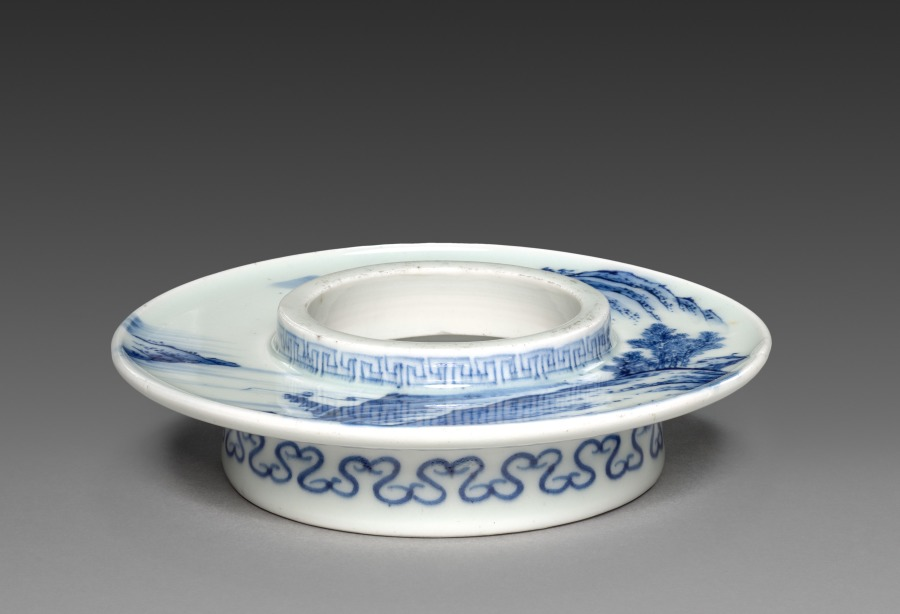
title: Cup Holder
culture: Japan, Edo period (1615–1868)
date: early to mid-1800s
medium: porcelain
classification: Ceramic